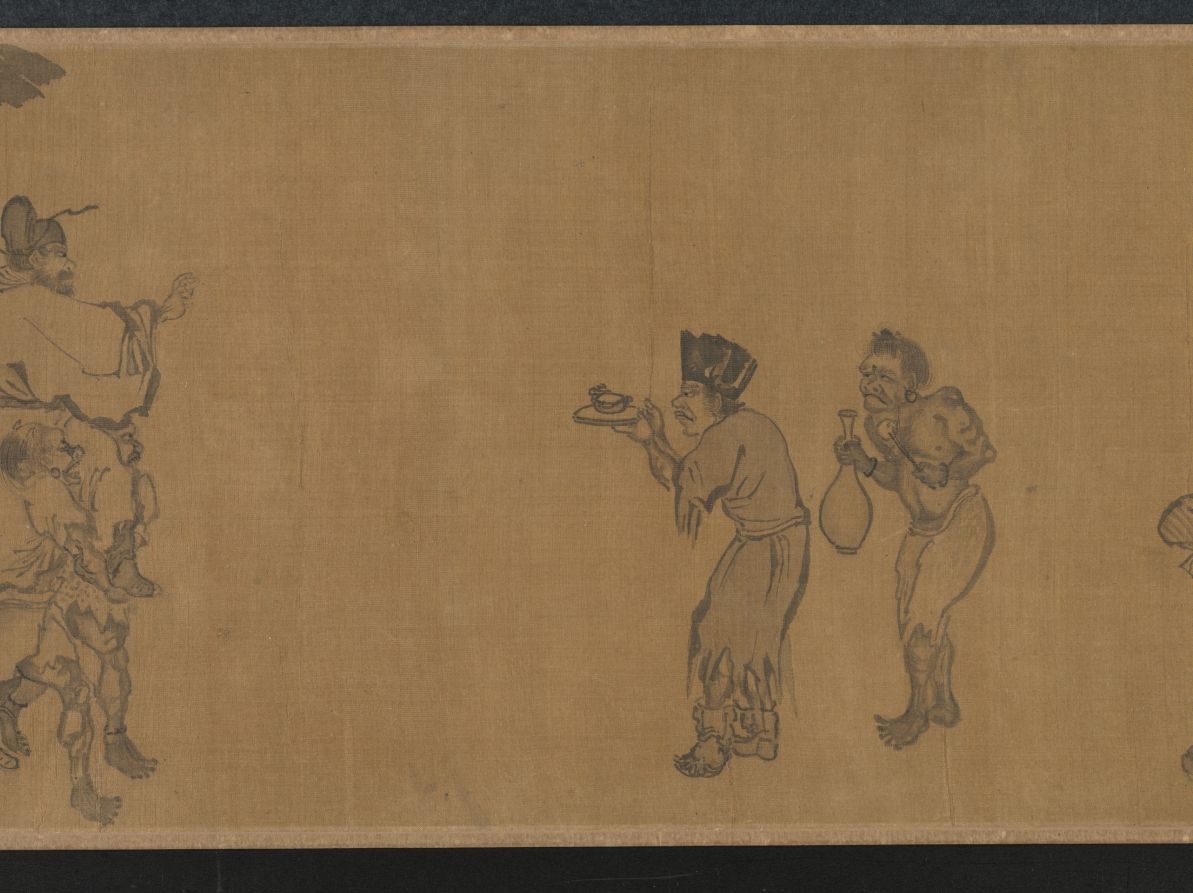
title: The Lantern Night Excursion of Zhong Kui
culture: China, Yuan dynasty (1271-1368)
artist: Yan Hui (Chinese, active 1270–1310)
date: late 1200s–early 1300s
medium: handscroll; ink and slight color on silk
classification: Painting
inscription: Artist's signature [and probable seal]: Yan Qiuyue 顏秋月 Title on frontispiece and 1 seal of Niu Shuyu 鈕樹玉 (1760–1827): Qiuyue mohuan 秋月墨幻 [Qiuyue's Ink Fantasy]. 31 additional seals: 2 of Yang Shiqi 楊士奇 (1365–1444); 2 of An Guo 安國 (1481–1534); 8 of Xiang Yuanbian 項元汴 (1525–1590); 2 of Geng Zhaozhong 耿昭忠 (1640–1686); 4 of Pu Tung 溥侗 (1870–1952); 7 of Tan Jing 譚敬 (1911–1991); 1 of Liu Ting-chih (20th c.); 5 unidentified.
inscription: An inscription by Zizhi Shanren 紫芝山人 [probably Jiang Hui 蔣惠], dated 1389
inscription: An inscription by Wu Kuan 吳寬 (1436–1504)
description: Here, the demon queller Zhong Kui leads a nightly procession of street entertainers with bare, muscular bodies and demonic faces. Some wear shabby clothes, and all perform stunts and tricks to astound and scare the viewer. In fact, a New Year custom in cities of southeast China had the poor, disguised as demons, process through the streets and play their tricks to clear households of evil spirits and welcome the spring. From right to left, a demonic figure leads the procession and beats a drum; another lifts a large rock; one stands on his hands trying to drink; one balances a jar on his elbow; three hold and wield weapons; one carries a folded chair covered by a cow’s skin; another holds Zhong Kui’s qin (zither), books, brush, and inkstone. At the end of the scroll, two figures offer a cup and bottle of wine to Zhong Kui, who lifts his hand in command.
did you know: Zhong Kui was an ancient ghostbuster.